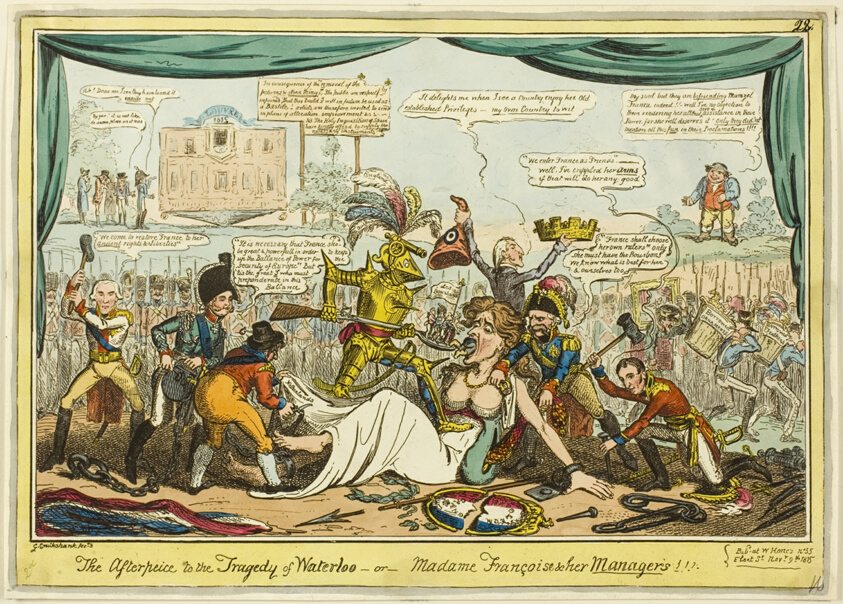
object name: Print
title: The Afterpiece to the Tragedy of Waterloo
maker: George Cruikshank (English, 1792-1878); published by Willam Hone (English, 1780 - 1842)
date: published November 9, 1815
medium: Hand-colored etching on paper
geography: England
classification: etching; print; prints and drawing